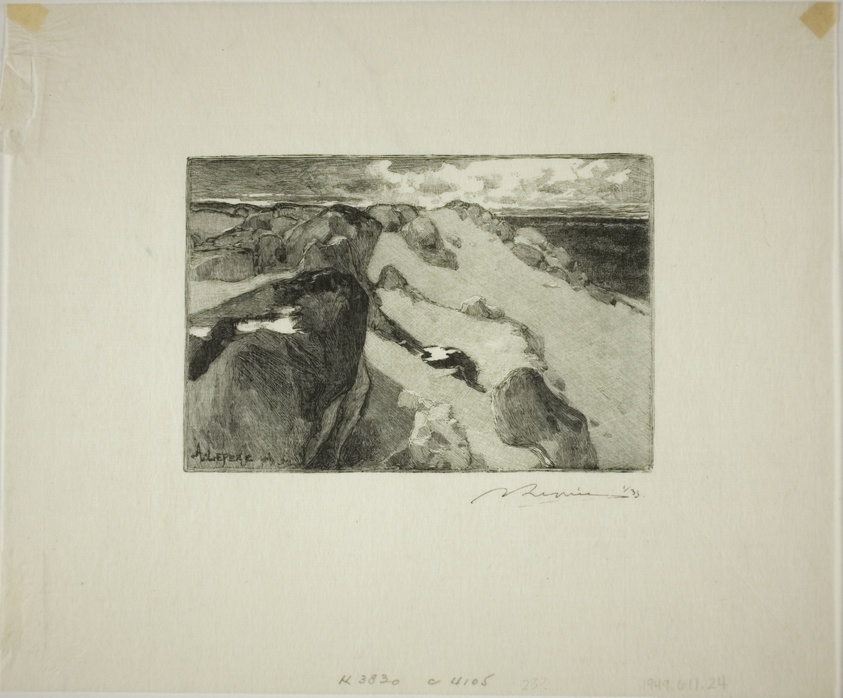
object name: Print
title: Arbonne: Le Gros Sablon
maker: Louis Auguste Lepère (French, 1849-1918); published by A. Desmoulins (French, active c. 1908-1910)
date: published 1908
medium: Wood engraving in black on cream laid Japanese paper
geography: France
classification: wood engraving; print; prints and drawing